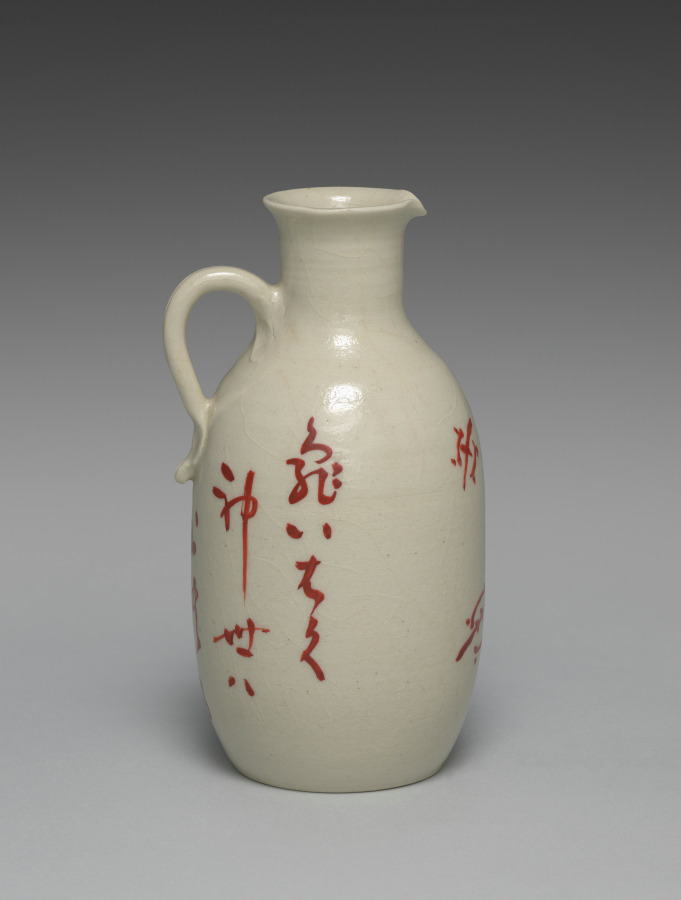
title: Tortoises Sake Pourer from Sake Pourers with Crane and Tortoises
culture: Japan, Meiji period (1868–1912)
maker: Seifū Yohei III (Japanese, 1851–1914)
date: 1893–1914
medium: One of a pair of sake flasks; porcelain with overglaze color enamel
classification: Ceramic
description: This flask has stencil-like paintings of three turtles—a young one with its parents—while the other in this pair has a crane with a leg raised. Cranes and turtles are well-recognized symbols of longevity in East Asia, with the turtle said to live for ten thousand years and the crane for one thousand. Each flask also has a poem on the back, one in Chinese and the other in Japanese. The latter, which appears on the turtle flask, reads kame iwaku kamiyo wa, ore no wakaki toki. The seventeen syllable poem begins with “turtle” and ends with “when I was young.” It can be translated as, “the turtle said the world of the gods began when I was young.”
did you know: This pair of seemingly humble sake pourers celebrate longevity and delight in a literary tradition that embraces multiple forms of poetic expression.